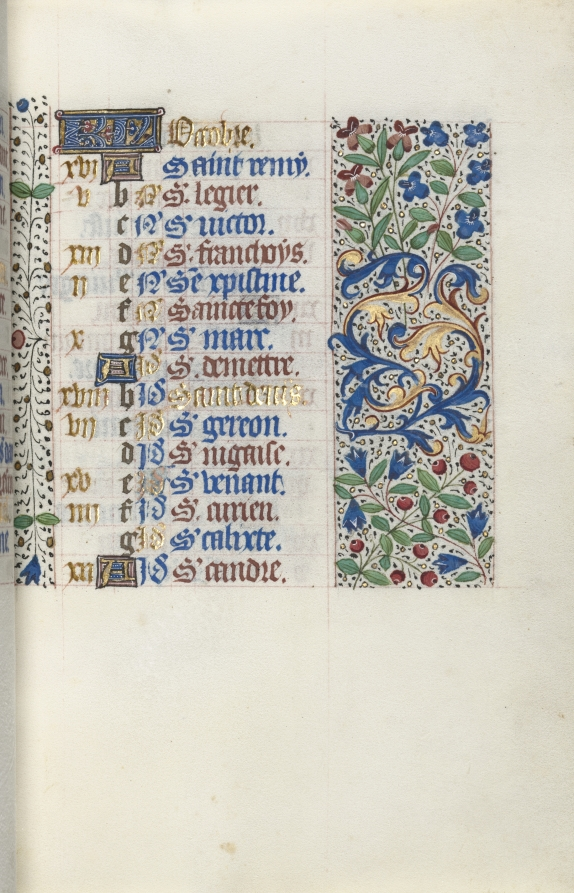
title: Book of Hours (Use of Rouen): fol. 10r, Calendar Page for October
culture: France, Rouen, 15th century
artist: Master of the Geneva Latini (French, active Rouen, 1460–80)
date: c. 1470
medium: ink, tempera, and gold on vellum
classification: Bound Volume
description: In the late 1400s and early 1500s Rouen was an established and important center of book production. The city’s cathedral had a wealthy chapter that spent large sums of money to commission books and to maintain its extensive library. The stationers and booksellers would have likely been concentrated in or near the cathedral precinct. This artist, named after a manuscript now in Geneva, was Rouen’s principal illuminator during the second half of the 1400s.